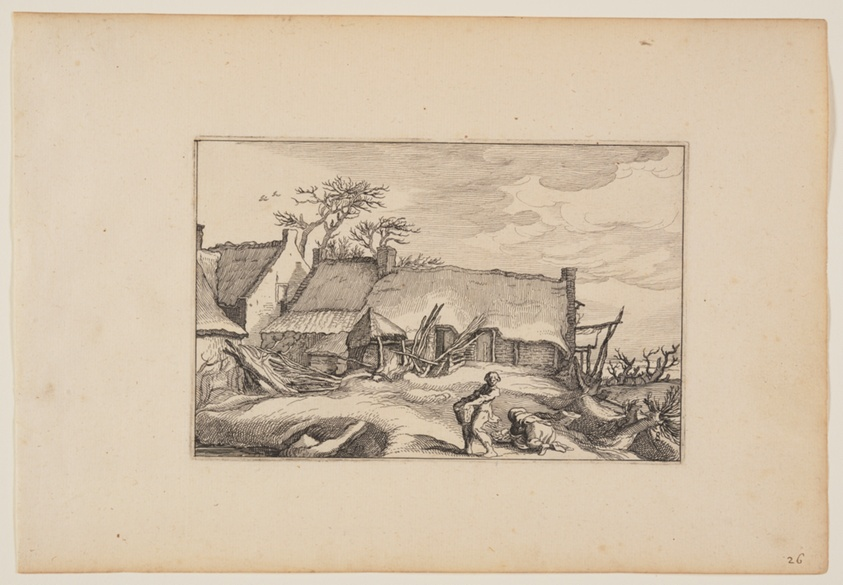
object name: Print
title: A Farmhouse, Man Carrying a Basket in Foreground, from Landscapes (Verscheyden aerdige Lanthuysen...)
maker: Claes Jansz. Visscher (Netherlandish, c. 1550–c. 1612); after Abraham Bloemaert (Dutch, 1566–1651)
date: 1620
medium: Etching on ivory laid paper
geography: Netherlands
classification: print; paper; prints and drawing; etching